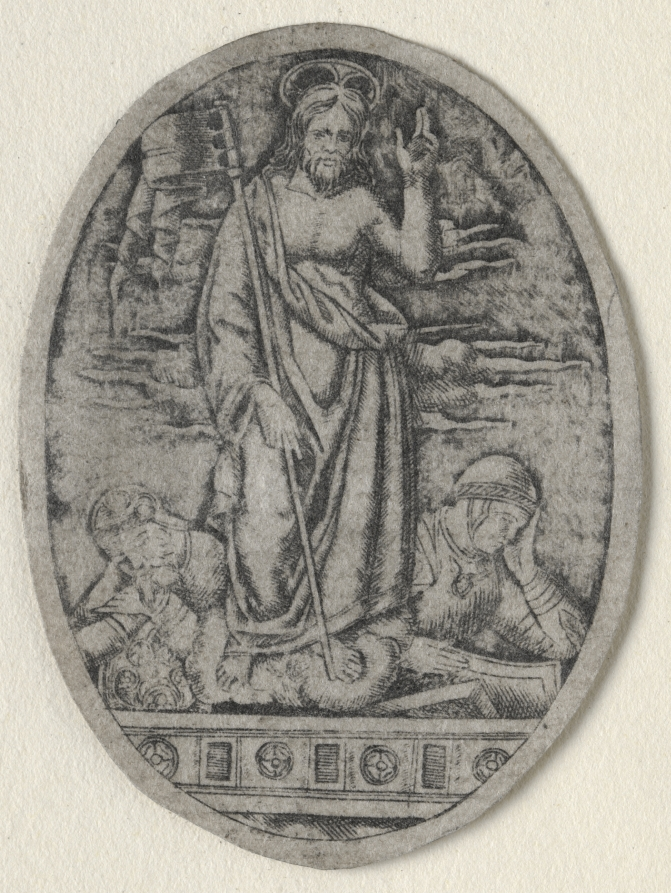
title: Resurrection of Christ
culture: Italy, 15th century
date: 1400s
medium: engraving - Niello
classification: Print